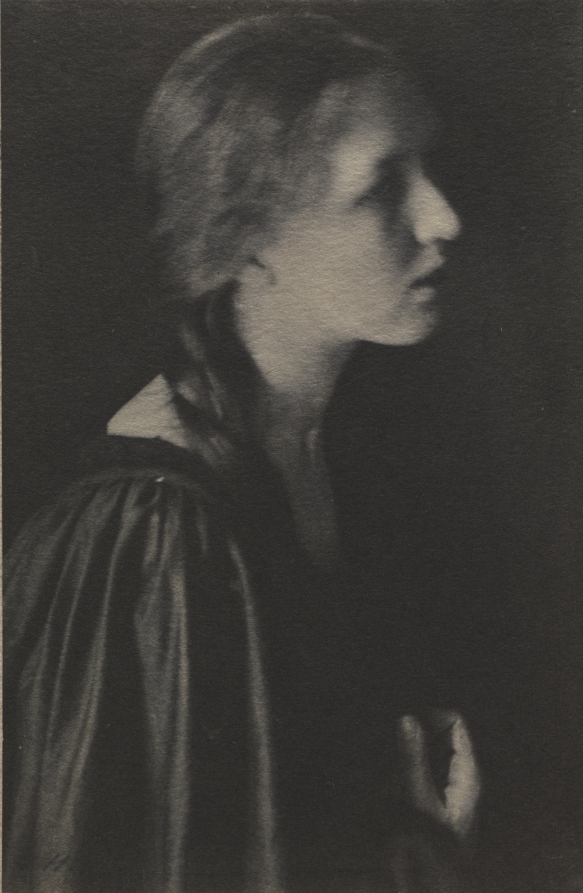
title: Letitia Felix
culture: America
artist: Clarence H. White (American, 1871–1925)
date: 1899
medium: platinum print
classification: Photograph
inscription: Written in pencil on recto of photo: "C.H. White [signed] '99"; in pencil on mount: "Letitia J. Felix 1899"